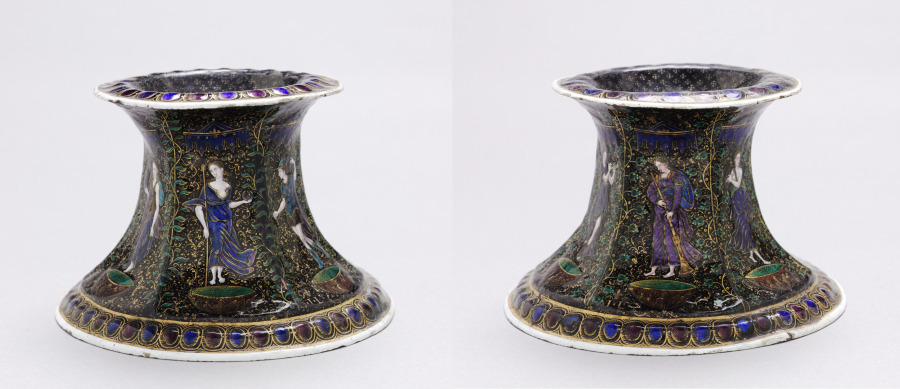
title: Salt Dishes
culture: France, Limoges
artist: Jean Limousin (French, 1528–c. 1610)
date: early 1600s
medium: painted enamel on copper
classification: Ceramic